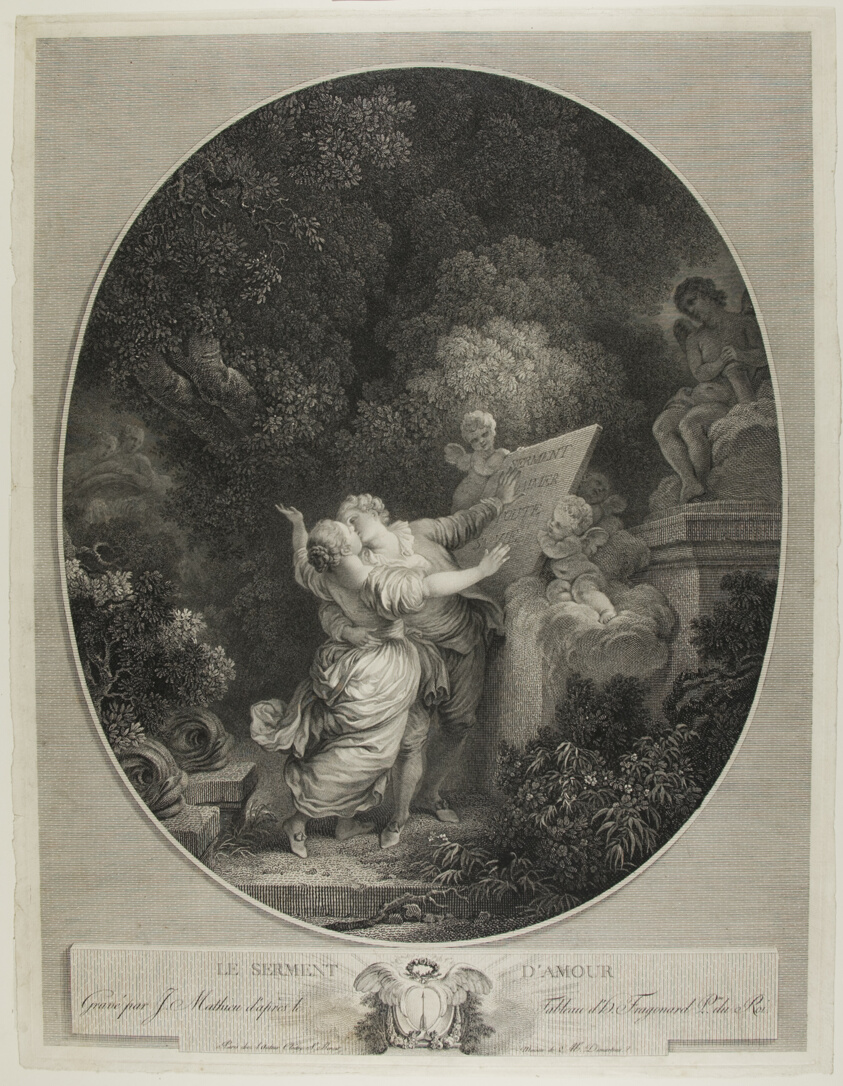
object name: Print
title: The Sermon of Love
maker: Jean Mathieu (French, 1749-1815); after Jean-Honoré Fragonard (French, 1732-1806)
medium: Engraving on paper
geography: France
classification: engraving; print; prints and drawing